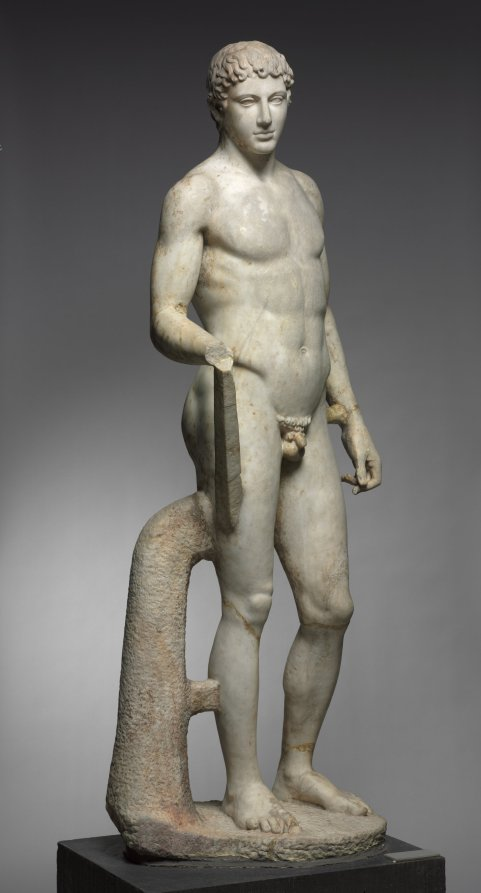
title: Statue of an Athlete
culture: Italy, Roman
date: 1–100 CE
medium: marble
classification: Sculpture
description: This idealized athlete recalls Greek sculptural types invented and popularized during the 400s BC. Large-scale athletes and other sculptures like this were originally created by famous artists as sanctuary dedications. Centuries later, they were widely copied and adapted by Roman sculptors, whose clients sought their own versions of earlier masterpieces. Working in marble rather than bronze, these sculptors added certain elements for stability, such as the struts and the large tree trunk beside the right leg here. Sculptures like this one are profoundly complex, made by and for Romans but descended from Greek ancestors.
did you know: For many years, this sculpture stood in the rotunda of the Cleveland Museum of Art.